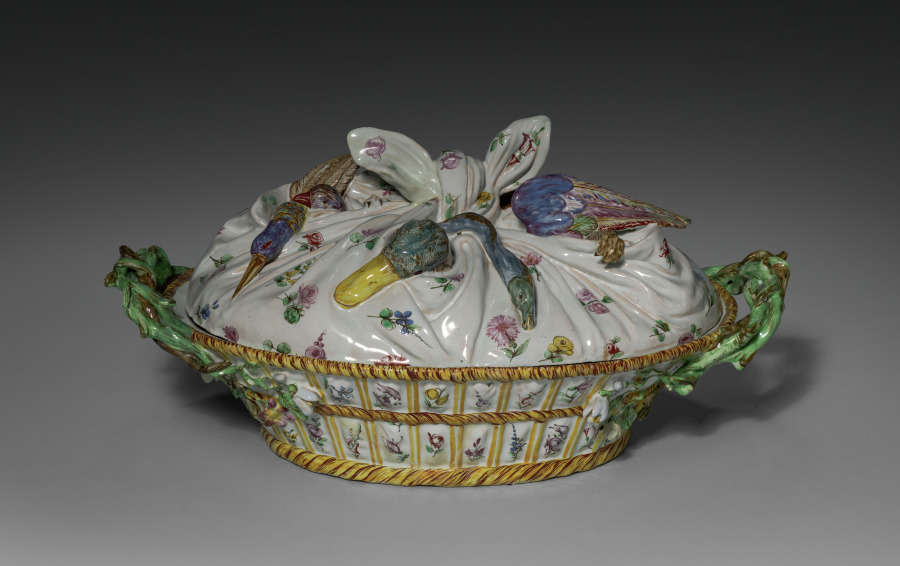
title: Covered Tureen in the Form of a Basket of Game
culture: France, 18th century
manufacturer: Sceaux Factory (French, active 1748–66)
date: c. 1755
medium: Tin- glazed earthenware (faience) wth enamel decoration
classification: Ceramic